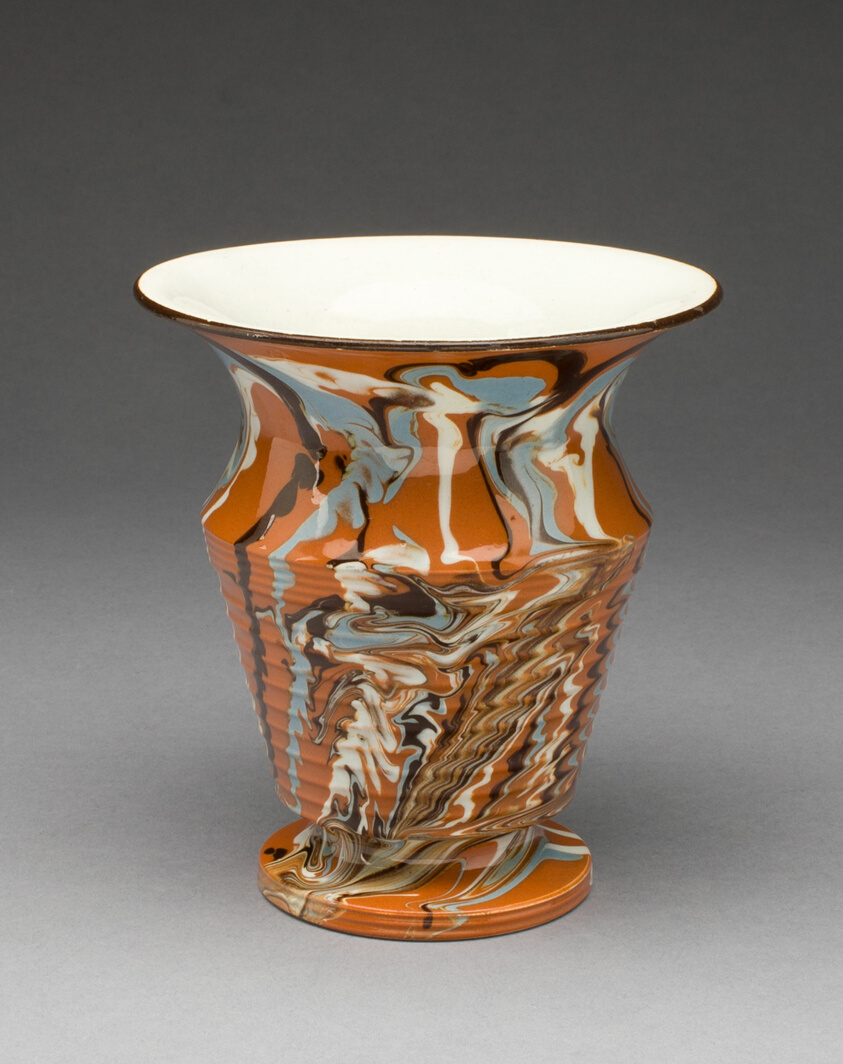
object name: Ceramics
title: Vase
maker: England, Staffordshire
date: c. 1810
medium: Lead-glazed earthenware (marble pearlware)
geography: Staffordshire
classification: vase; earthenware; vessel; european decorative arts; creamware; lead-glazed earthenware; ceramics